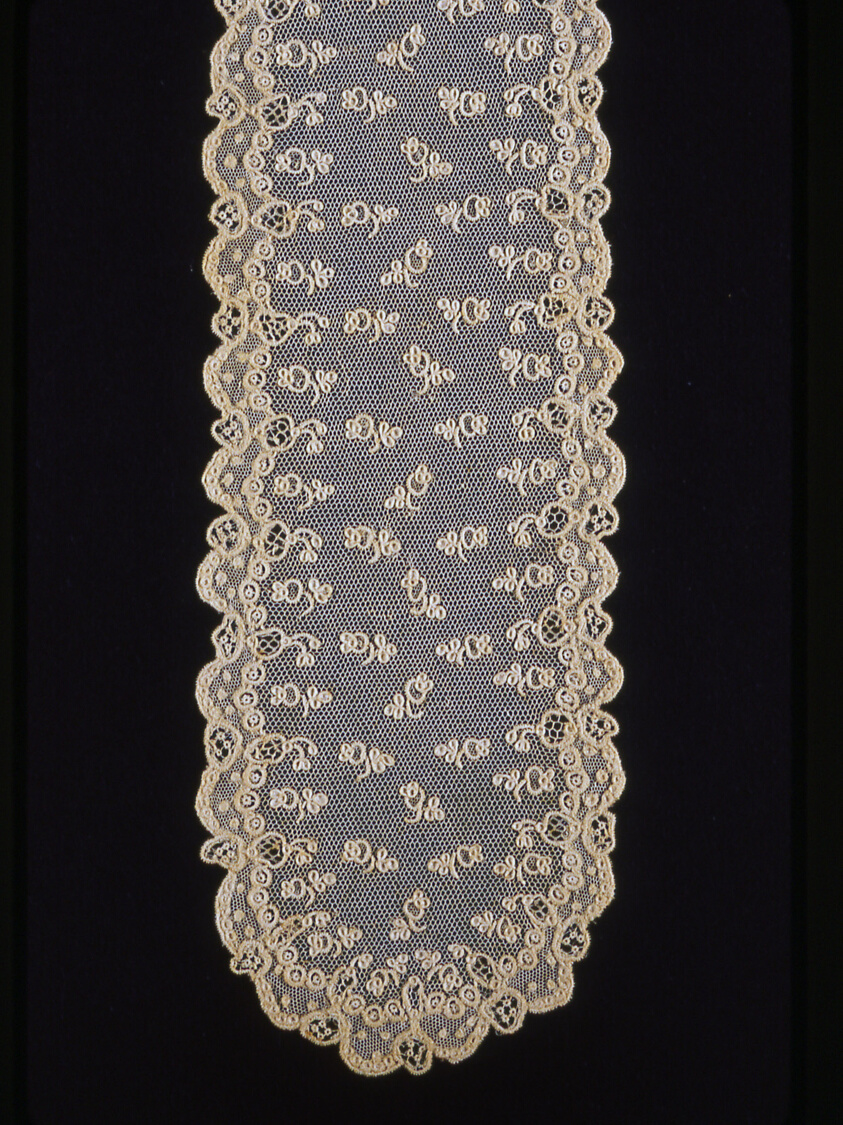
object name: Costume and Accessories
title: Pair of Lappets (Joined)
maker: France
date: 1880s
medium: Linen, needle lace of a type known as "Point d'Argentan" with a whipped mesh ground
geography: France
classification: costume accessory; lace - needle; textile; costume; costume accessory - headdress; costume accessory worn above the waist